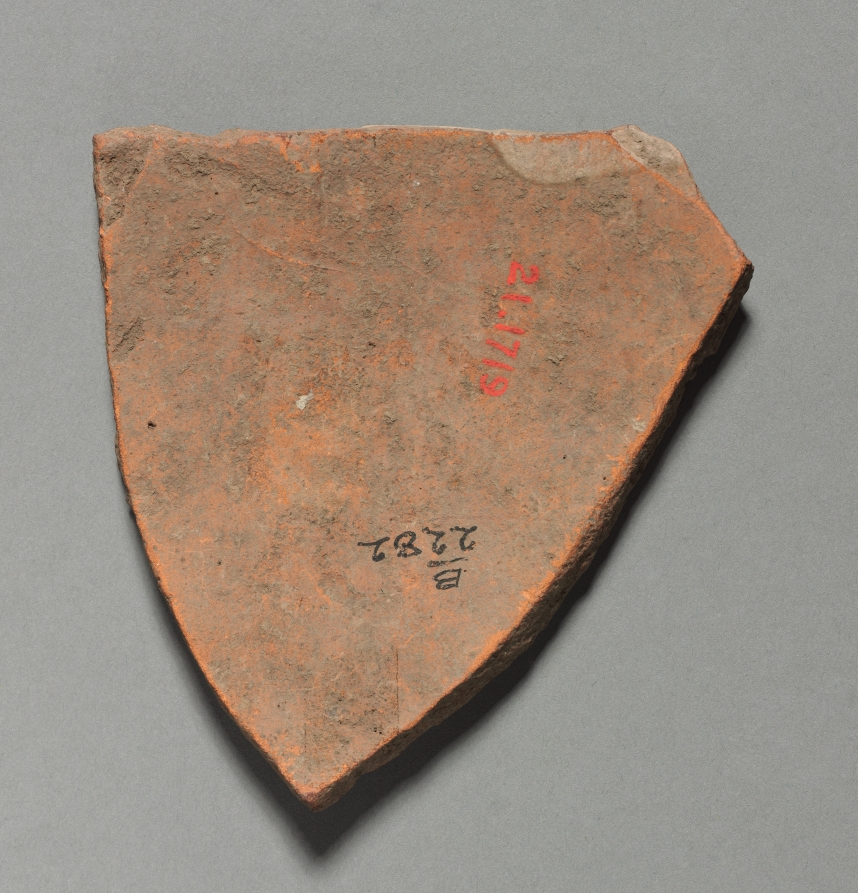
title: Fragment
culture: Peru, Inka, 1400-1532 AD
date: 1400–1532 AD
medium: pottery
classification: Ceramic